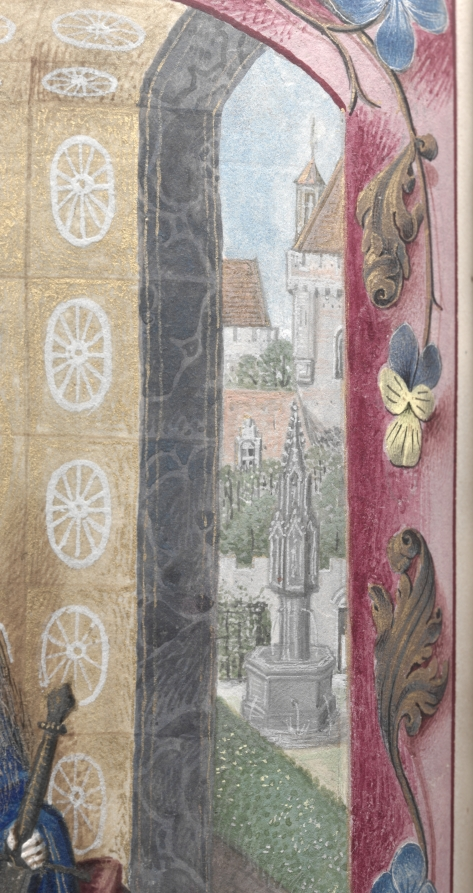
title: Hours of Queen Isabella the Catholic, Queen of Spain: Fol. 189v, St. Catherine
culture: Flanders, Ghent and Bruges, late 15th century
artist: Master of the First Prayerbook of Maximillian (Flemish, c. 1444–1519)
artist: and Associates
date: c. 1500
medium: ink, tempera, and gold on vellum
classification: Bound Volume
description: This manuscript was illuminated by a circle of at least five highly organized manuscript painters active in the Flemish cities of Ghent and Bruges. The principal illuminator was Alexander Bening, who painted the majority of the book's miniatures. Manuscripts produced by this circle of artists are renowned for the decoration of their borders, which typically feature a rich variety of realistically-painted flowers, birds, and butterflies. This prayer book, called a book of hours, was intended not for a cleric, but for the private devotions of a lay person-in this case, Isabella the Catholic, Queen of Spain (1451-1504). Isabella's coat of arms embellishes the book's frontispiece. It is unlikely that the book was commissioned by the Queen herself; rather, she probably received it as a diplomatic gift from someone courting her patronage, perhaps Cardinal Francisco Jimenez de Cisneros. A Franciscan friar, Jimenez was dependent upon Isabella for his advancement, first to the post of Queen's confessor in 1492, and then to Archbishop of Toledo in 1495.